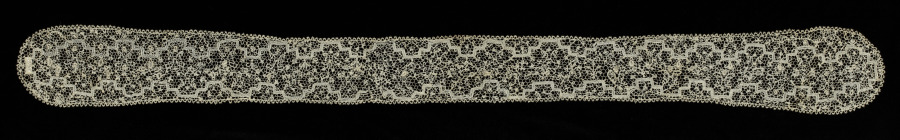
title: Lace Lappet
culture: Italy, Venice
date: 1600s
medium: Linen: needle lace (Punto Corallina)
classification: Lace